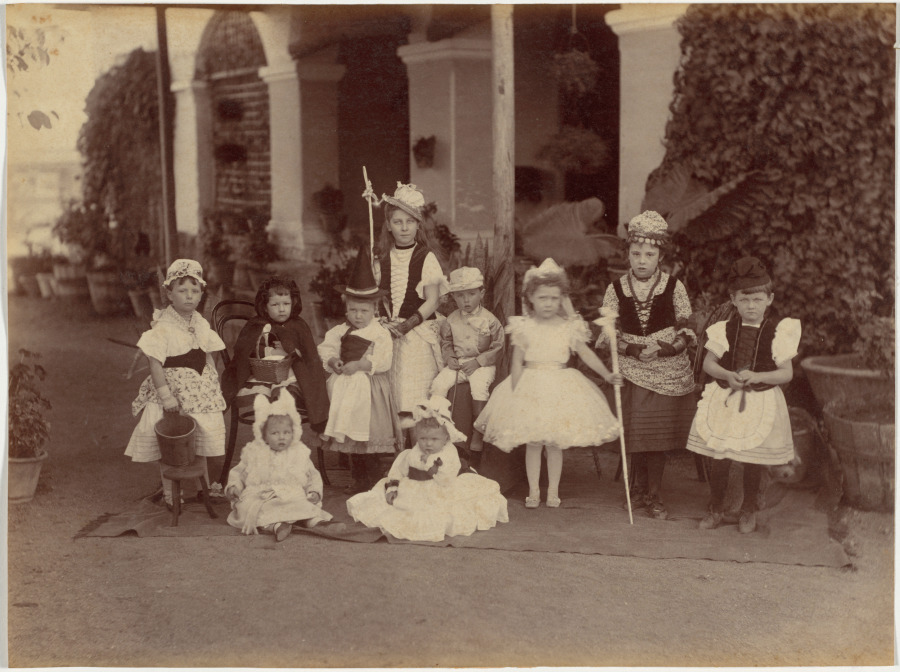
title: Fancy Group of Children, Indore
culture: India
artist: Raja Deen Dayal (Indian, 1844–1905)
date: 1886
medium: albumen print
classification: Photograph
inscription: No visible inscriptions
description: Children’s “fancy dress” or costume parties were also popular among the British during the Victorian era. Fairy tales inspired a number of the costumes shown here, including Little Red Riding Hood with basket and cape, Little Miss Muffet with a milking stool and bucket, and Little Bo Beep and her shepherd’s crook. Note the dog peeking out behind the girl on the right.